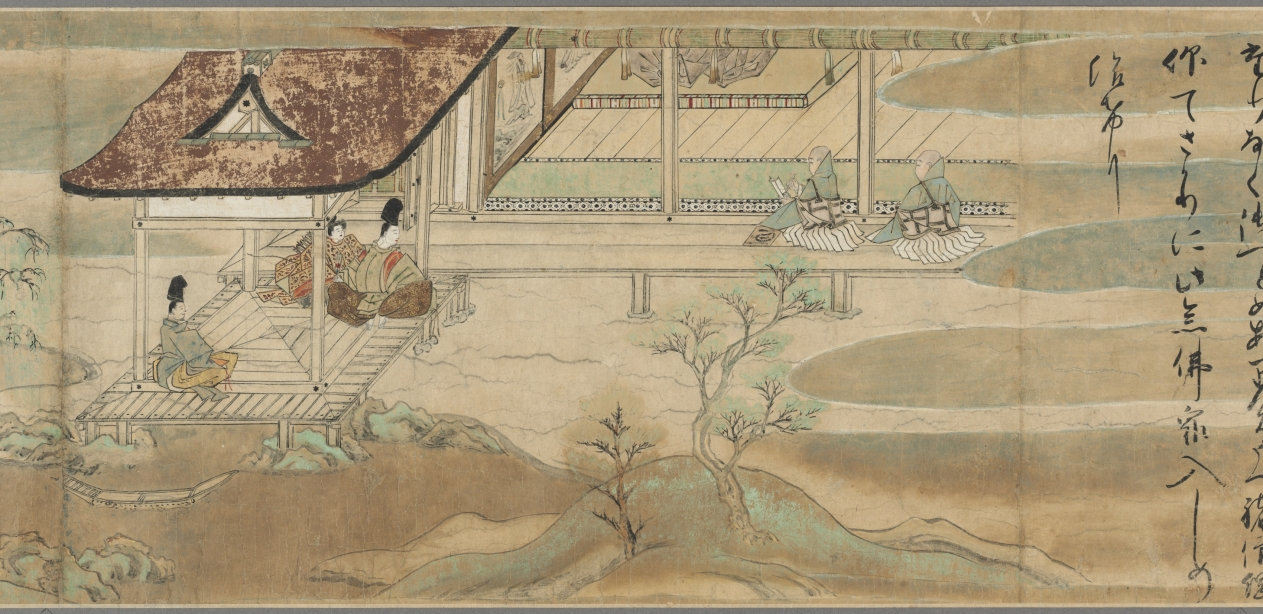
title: The Illustrated Miraculous Origins of the Yūzū Nenbutsu School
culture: Japan, Kamakura period (1185–1333)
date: early 1300s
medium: Handscroll; ink, color, and gold on paper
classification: Painting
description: This painting is the second of a set of two illustrated handscrolls. The first scroll depicts the biography of the Japanese Buddhist monk Ryōnin. This scroll begins with scenes of Ryōnin’s death and relates episodes illustrating the efficacy of following his teachings. Ryōnin asserted the total interconnectedness of all things and the spiritual benefit of chanting the name of the Buddha Amida for one another.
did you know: The other scroll from this two-scroll set belongs to the Art Institute of Chicago.